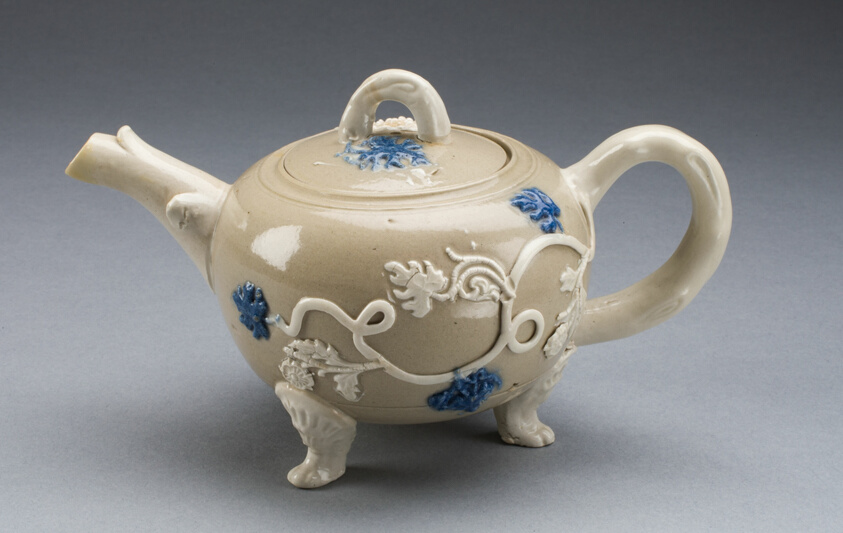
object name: Ceramics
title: Teapot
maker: Staffordshire, England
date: 1750/55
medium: Salt-glazed stoneware, with applied decoration and polychrome enamels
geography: Staffordshire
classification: teapot; european decorative arts; ceramics; stoneware; salt-glazed stoneware